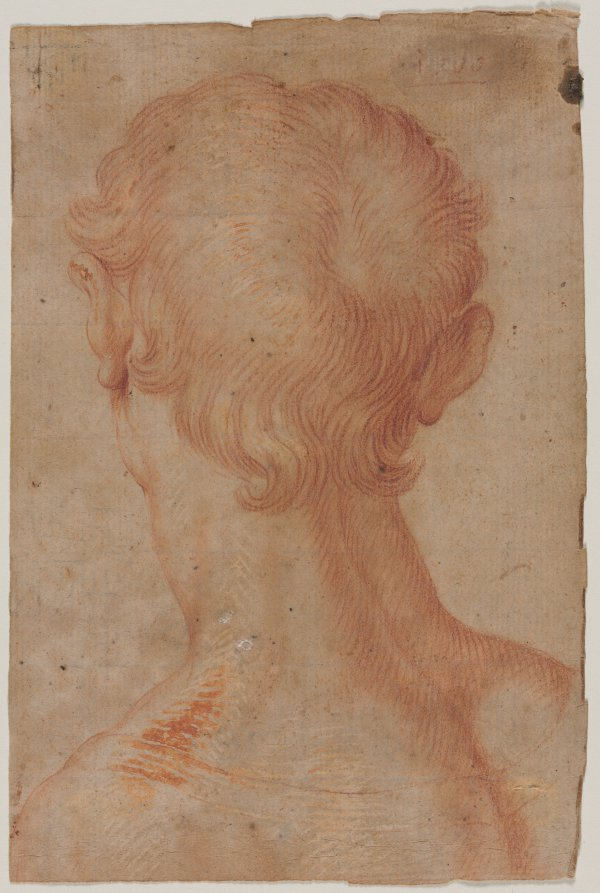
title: Man's Head from the Back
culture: Italy, 16th century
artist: copy after Agnolo Bronzino (Italian, 1503–1572)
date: 16th century?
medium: red chalk with red and white gouache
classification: Drawing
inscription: upper right, in red chalk: i[?][oo?] [underlined] ; VERSO, upper left, in red pencil: A 83 ; upper right, in red pencil: 10- ; lower center, in graphite: 83 [circled]